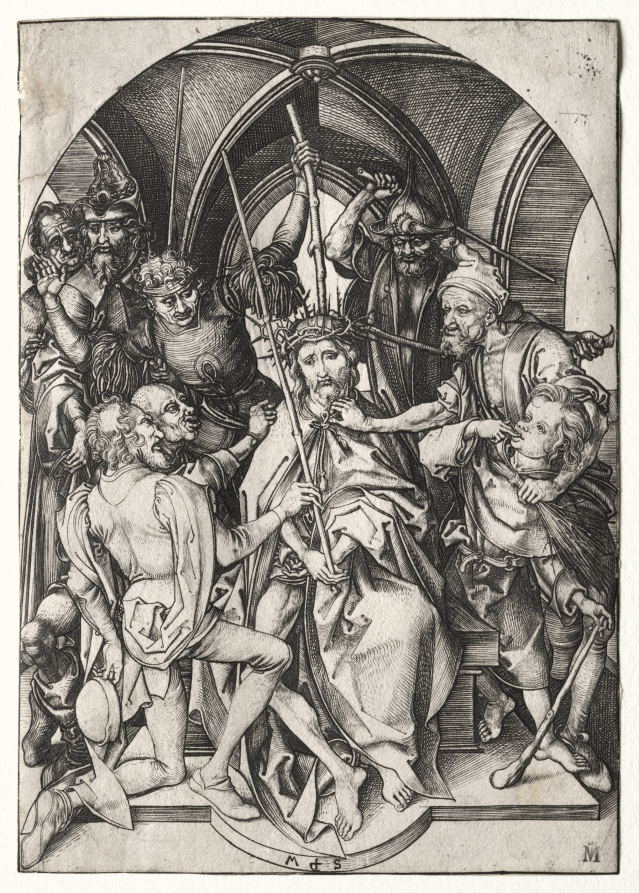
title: Christ Crowned with Thorns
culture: Germany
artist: Martin Schongauer (German, c. 1450–1491)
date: 1470–82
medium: engraving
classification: Print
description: Martin Schonaguer's series of the Passion of Christ was his largest set of engravings, made around 1480, and extensively copied across Europe. It consists of twelve prints detailing the suffering of Christ in the last days of his life. Schongauer's version focuses on crowded scenes, grotesque physiognomies of Christ's tormentors, and great pathos in the compositions. Here, Jesus is seated on a wooden bench, dressed in a robe and wearing the crown of thorns. His tormentors, including a child, are mocking him and place a reed scepter in his hands.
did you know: On the left, behind Christ's tormentors, Pontius Pilate makes his first appearance in Schongauer's cycle of the Passion.